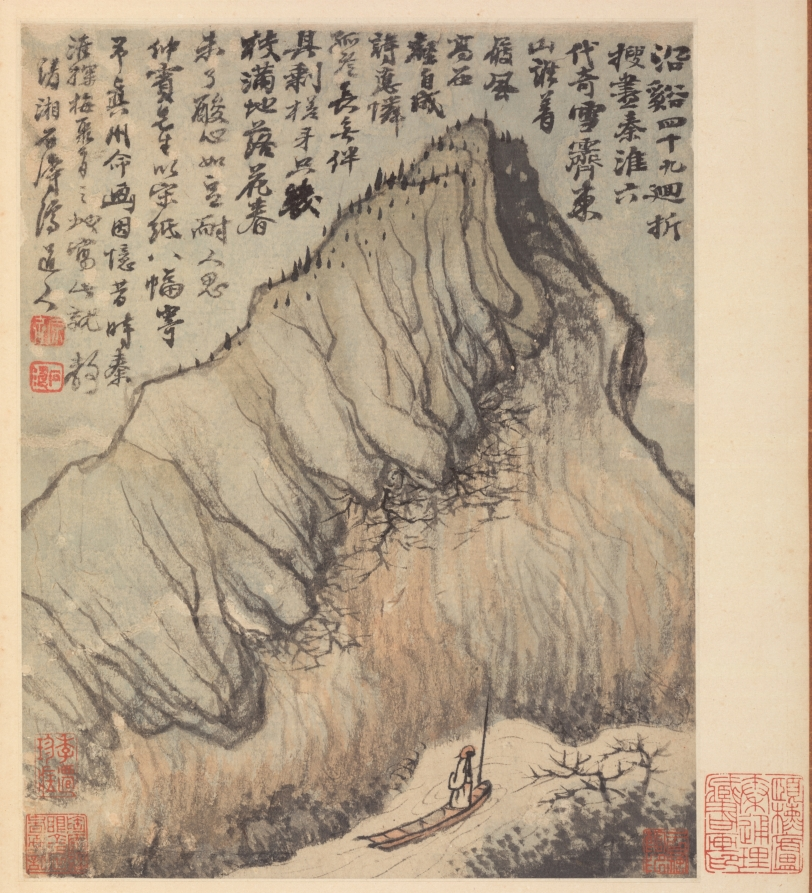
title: Reminiscences of Qinhuai River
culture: China, Qing dynasty (1644-1911)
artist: Shitao (Chinese, 1642–1707)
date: 1642–1707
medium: Album leaf; ink and color on Song paper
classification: Painting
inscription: 沿溪四十九迴折，搜盡秦淮六代奇。/ 雪霽東山誰着屐，風高西壑自成詩。/ 應憐孤冷長無伴，其剩槎牙只幾枝。/ 滿地落花春未了，酸心如豆耐人思。/ 仲賓先生以宋紙十幅寄余真州命畫。因憶昔時秦淮探梅聚首之地，寫此就教。清湘石濤濟道人。[印]原濟; 石濤.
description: This album leaf was probably created in 1695 for a friend Shitao had traveled with to visit ancient sites along the Qinhuai River from the Six Dynasties period. A tiny figure in a boat looks up in awe toward rising mountain masses that form an overhanging cliff, perhaps an image for the overwhelming history of Nanjing. Shitao was born two years before the Ming dynasty fell. A descendant of the first Ming emperor, he later lived in Nanjing, Yangzhou, and Anhui province. Despite his affiliation with the Ming imperial family, he met the Qing dynasty Kangxi emperor twice.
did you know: The figure in the boat scans the cliff seeking a glimpse of a final plum blossom of the season.